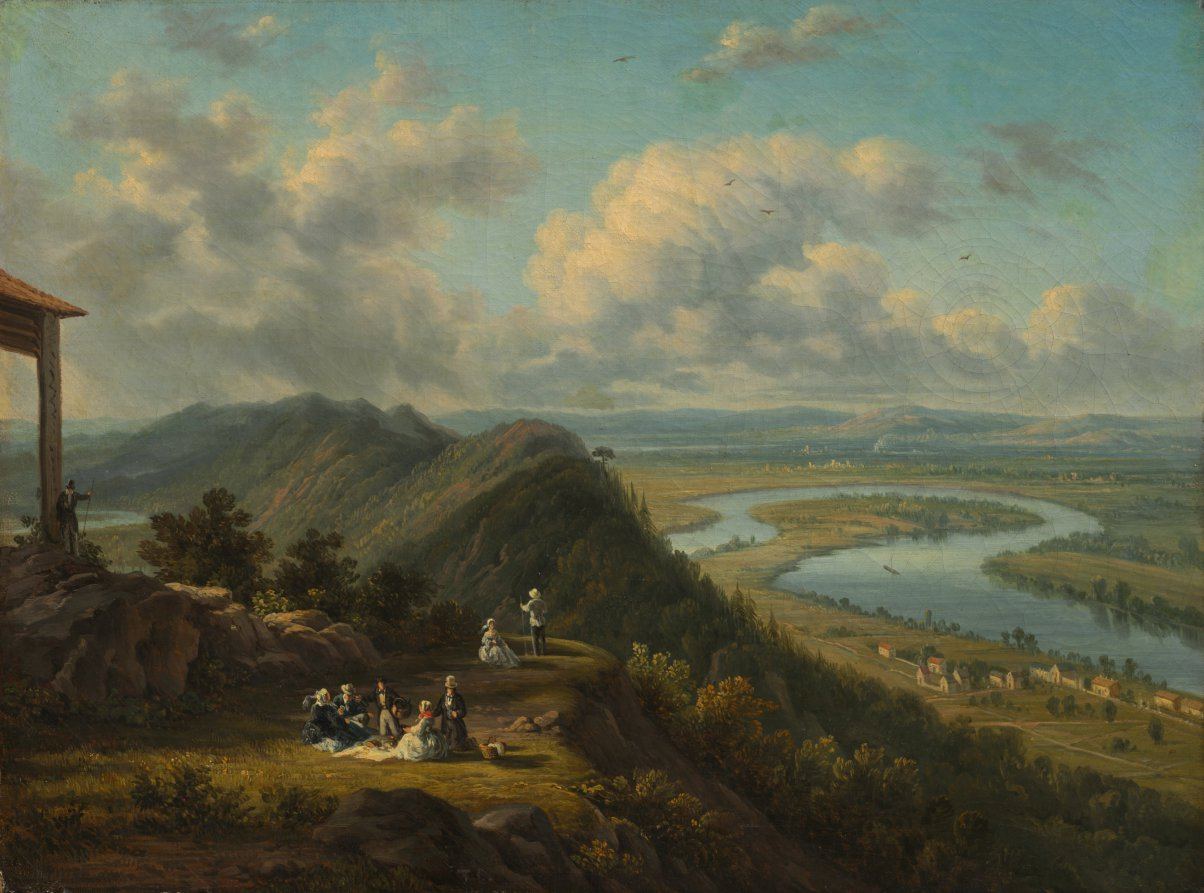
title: The Oxbow Seen from Mount Holyoke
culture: France, 19th century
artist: attributed to Victor de Grailly (French, 1804–1889)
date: after 1840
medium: oil on fabric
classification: Painting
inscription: An original signature is not apparent; the initials T. C. can be seen in a light violet color, centrally located along the bottom edge